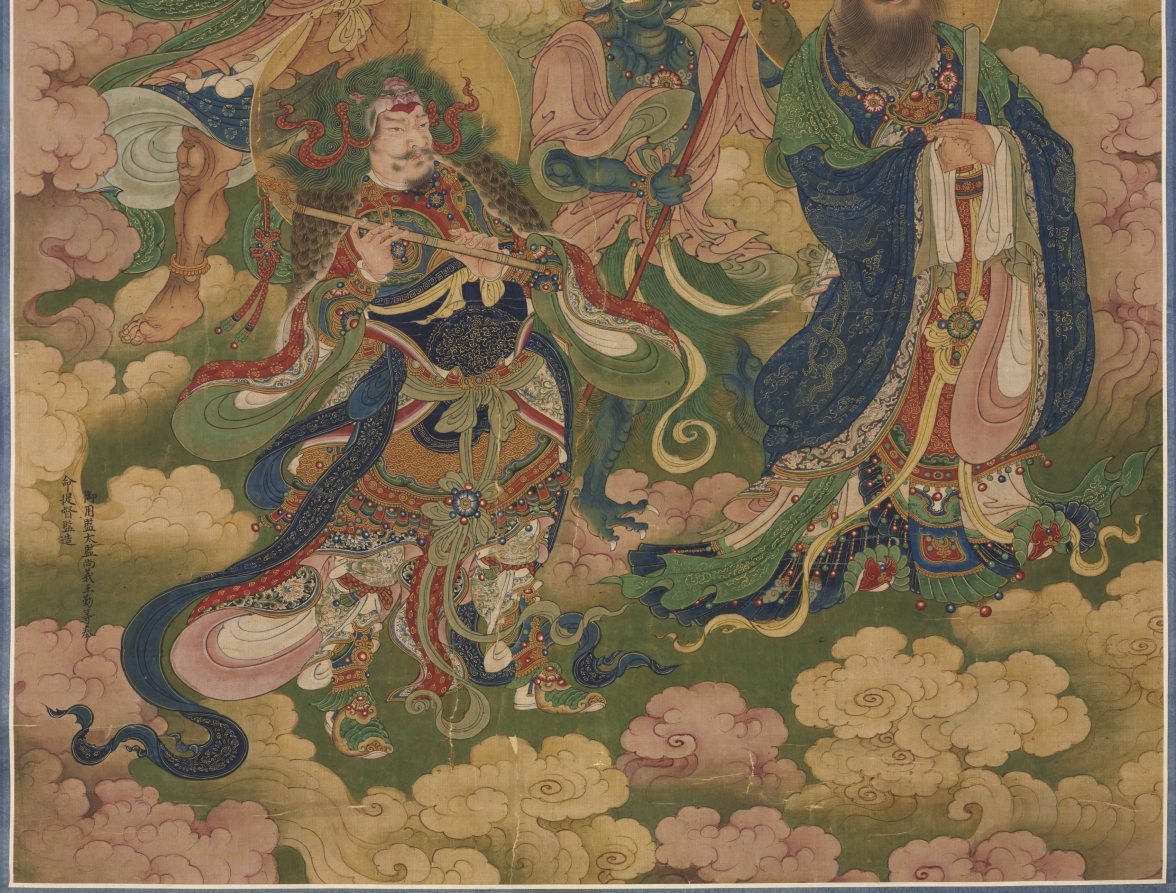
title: The Eight Hosts of Deva, Naga, and Yakshi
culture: China, Ming dynasty (1368–1644)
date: 1454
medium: hanging scroll; ink and color on silk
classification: Painting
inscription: 大明景泰五年八月初三日施 [印] 廣運之寳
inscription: 御用監太監尚義王勤等奉命提督監造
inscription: 天龍八部羅叉女衆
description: The grandest of the Buddhist mortuary rites is the Water-Land (shuilu) ritual. This esoteric ceremony is conducted for the salvation of “all souls of the dead on land and sea.” The ostentatious ritual was performed for imperial ancestors and high officials from the Song (960–1279) to the Ming dynasties and drew large crowds. On the second day of the weeklong ceremony, paintings are hung in the inner altar. This scroll represents the Eight Hosts of Celestial Nagas and Yakshis as described in the Lotus Sutra. Together with CMA 1973.70.1, it belongs to a set of 36 Water-Land ritual paintings that are the finest works of their types known from the Ming period. With their bright, opaque color and fine-line gilt decoration intact and unfaded, both paintings share a remarkable state of preservation.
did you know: The Naga is on the lower right dressed as a king with gold dragons on his blue robe.